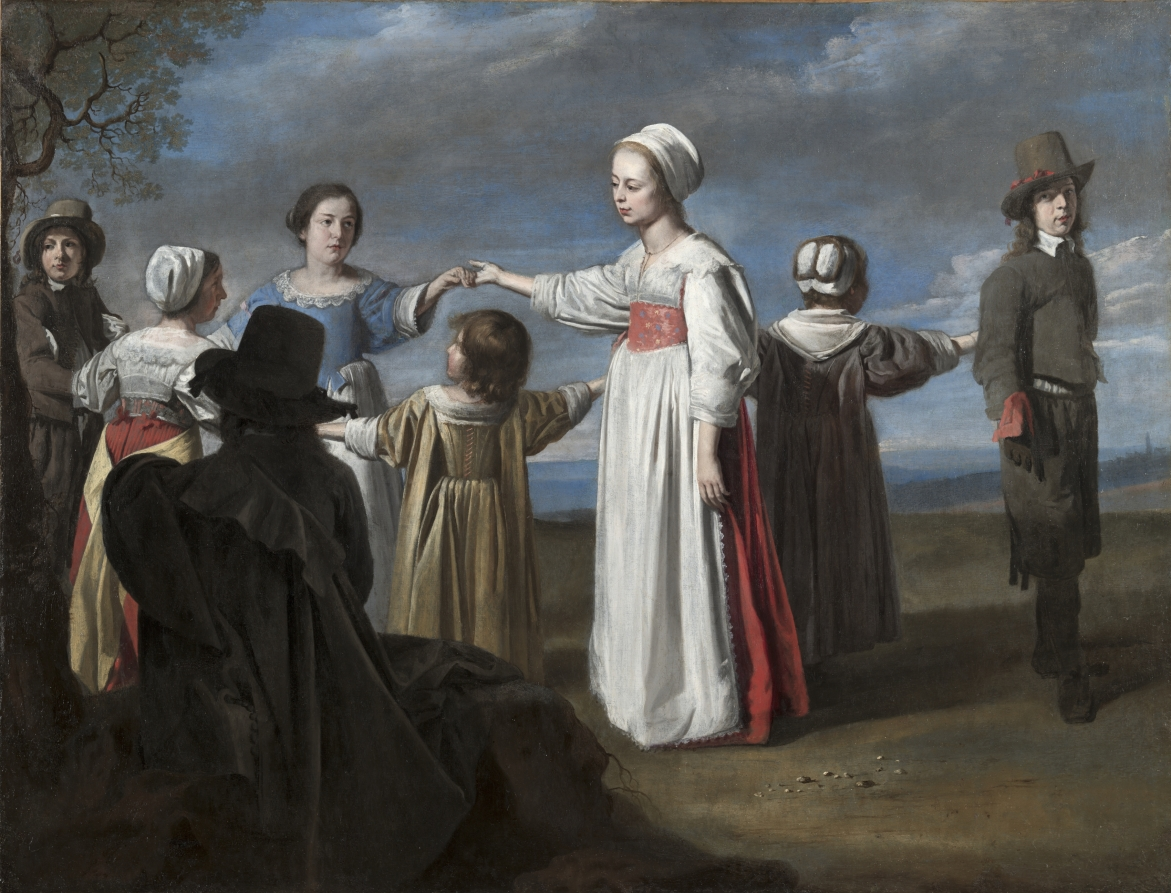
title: Children Dancing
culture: France, 17th century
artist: circle of Le Nain (French)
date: c. 1650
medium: oil on canvas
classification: Painting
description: Antoine, Louis, and Mathieu Le Nain were brothers who ran a collective studio in Paris from around 1630 until 1648, when Antoine and Louis died. Mathieu continued to produce work under their name "Le Nain" throughout the 1650s. Of the museum's four paintings that have been called "Le Nain" (1958.174, 1958.175.1, 1958.175.2), this work has held its attribution to Mathieu the longest. With his back to the viewer, a musician sits in shadow while a group of children pose patiently in a chain-like formation, awaiting the start of their dance. Because of its reliance on order and collaboration, dancing symbolized familial harmony. The attention to the individuality of the children suggest a family portrait, while their wistful expressions and melancholic tone have led to the hypothesis that the children are portraits-both living and posthumous. The description of the intricate lace and the wearied expressions of the slim boys is characteristic of Mathieu's handling. However, the canvas has been attributed to one of Mathieu's followers, the Master of the Games, because of the static, brightly lit figures whose elongated shadows don't quite describe their forms.